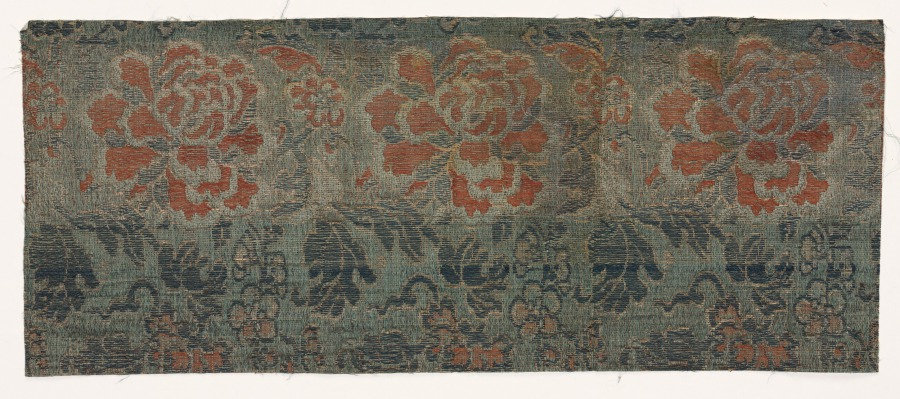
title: Textile Fragment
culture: Japan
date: 1800s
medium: silk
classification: Textile